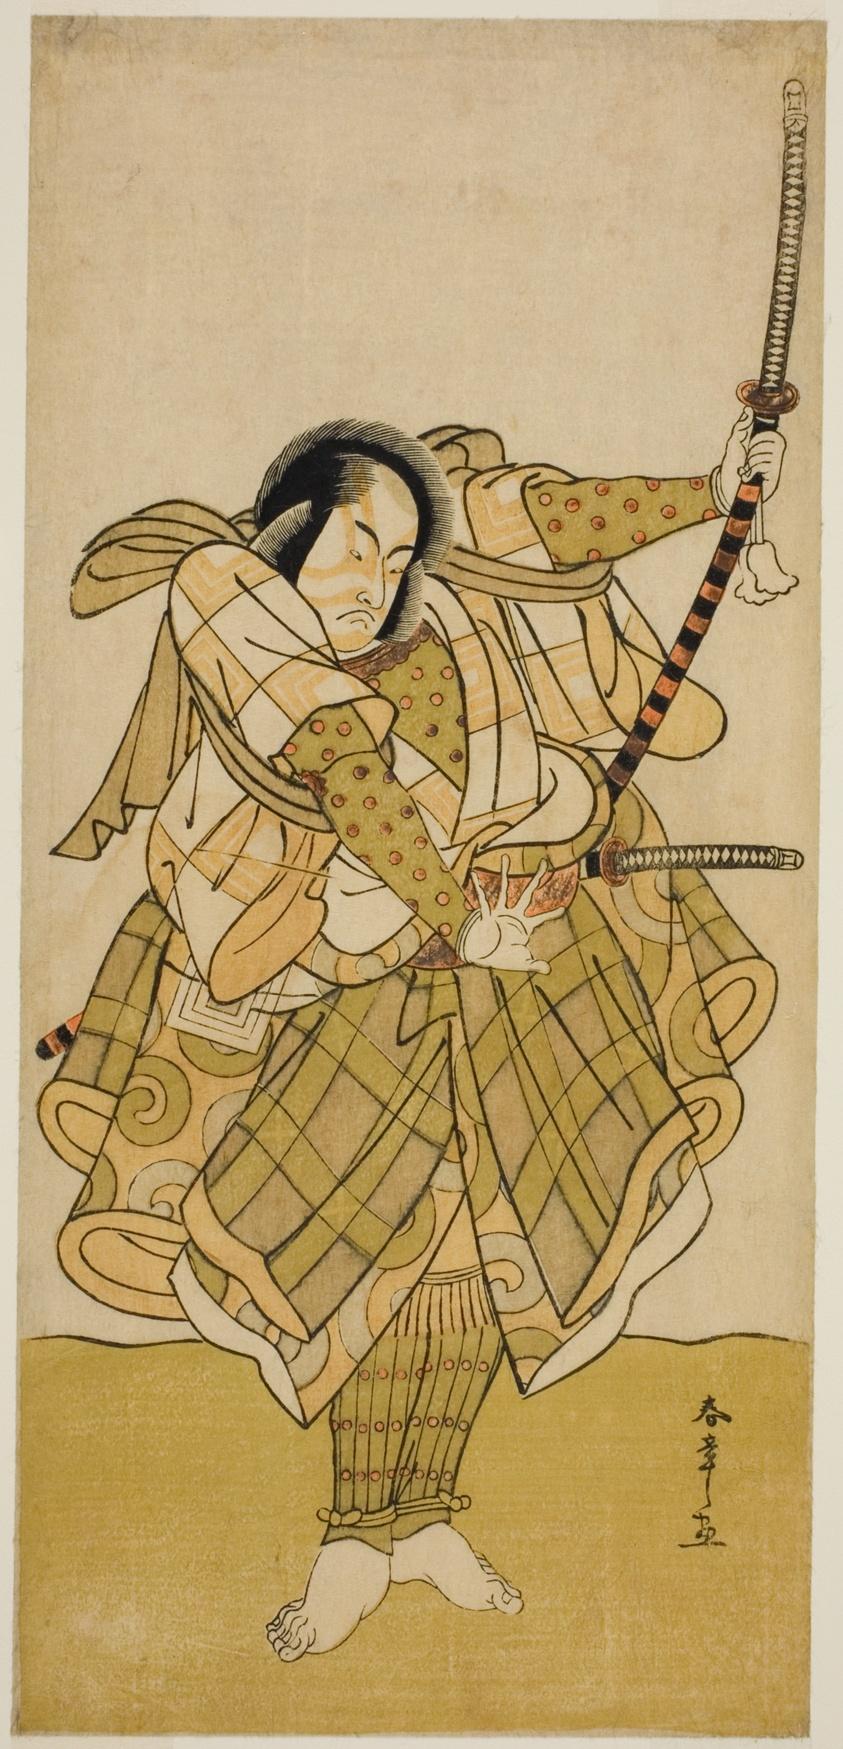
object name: Print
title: The Actor Ichikawa Monnosuke II in an Unidentified Role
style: Japanese (culture or style)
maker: Katsukawa Shunsho 勝川 春章; Japanese, 1726-1792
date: c. 1779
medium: Color woodblock print; hosoban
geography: Japan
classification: woodblock print; print; asian art